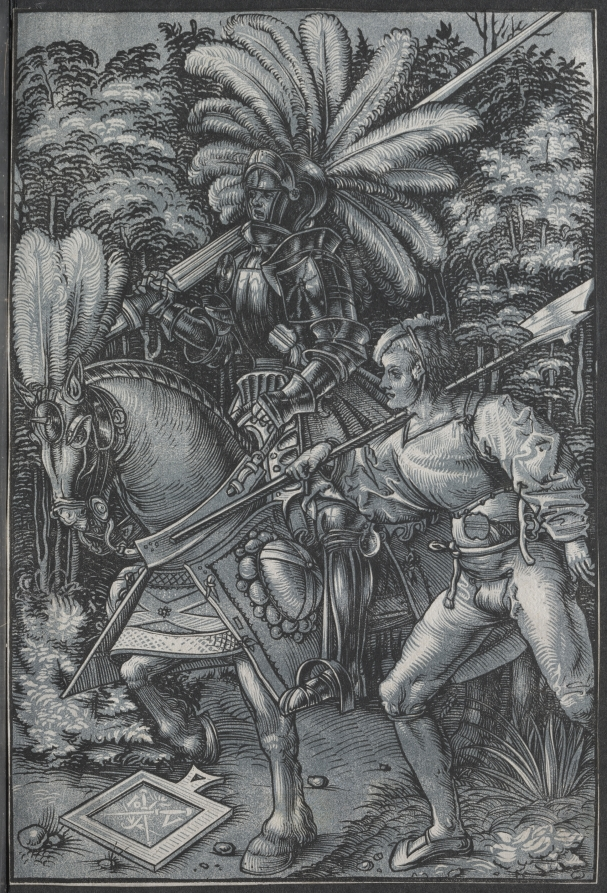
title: The Knight and Lansquenet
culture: Germany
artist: Hans Wechtlin (German, 1480/85–after 1526)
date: c. 1512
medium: chiaroscuro woodcut (in blue and black)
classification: Print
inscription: lower left, in block: [monogram]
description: By 1509 color prints were successfully produced by printing the line block in black but using a second block to print the background color. Unprinted areas of white paper formed the highlights. Wechtlin’s The Knight and Lansquenet is a beautiful example of this technique.